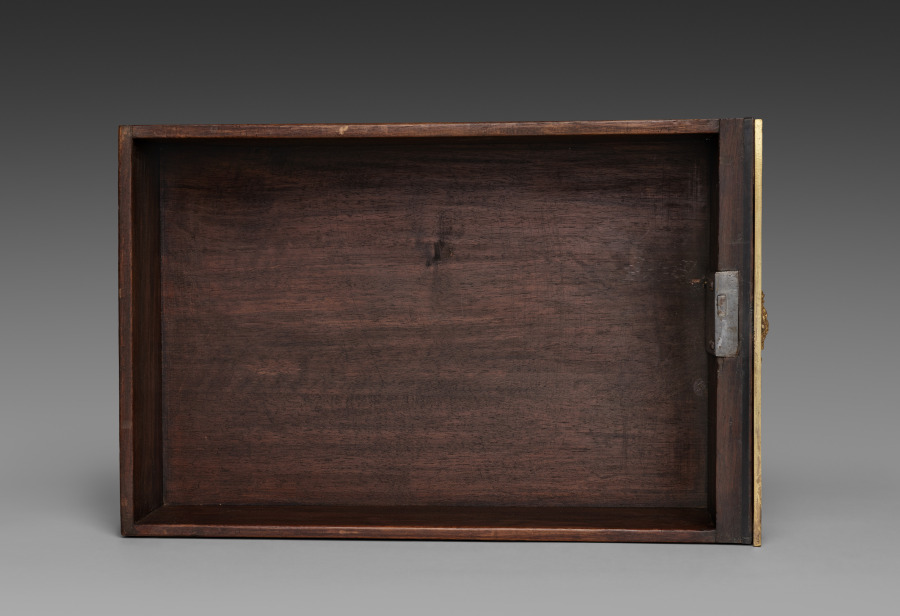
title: Side Drawer for Cabinet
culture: France, late 17th Century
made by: André-Charles Boulle (French, 1642–1732)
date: c. 1690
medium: ebony, marquetry in metal and tortoise shell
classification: Furniture and woodwork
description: Appointed cabinetmaker to King Louis XIV in 1672, André-Charles Boulle became a master of furniture making in France during the late 1600s until his death in 1732. Known primarily for his use of marquetry, in which metal patterns are inlaid into tortoiseshell then applied within the veneered surface of the furniture, Boulle established a level of quality and craftsmanship few others could achieve. As a result, his work found favor at the royal court and among other aristocrats and diplomats eager to impress the king. The inclusion of a medallion depicting Louis XIV within the bronze decoration of this chest would have identified the owner with the royal court. Often exhibiting stout architectural proportions with elegant groups of inlaid motifs such as the parrot on the central panel of this chest, Boulle’s designs are an example of the intellectual fashion for contrasting ideas, materials, and motifs.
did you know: Originally designed to sit atop an elaborate tall stand, this chest was likely altered in the late 1700s to reduce its scale and height.